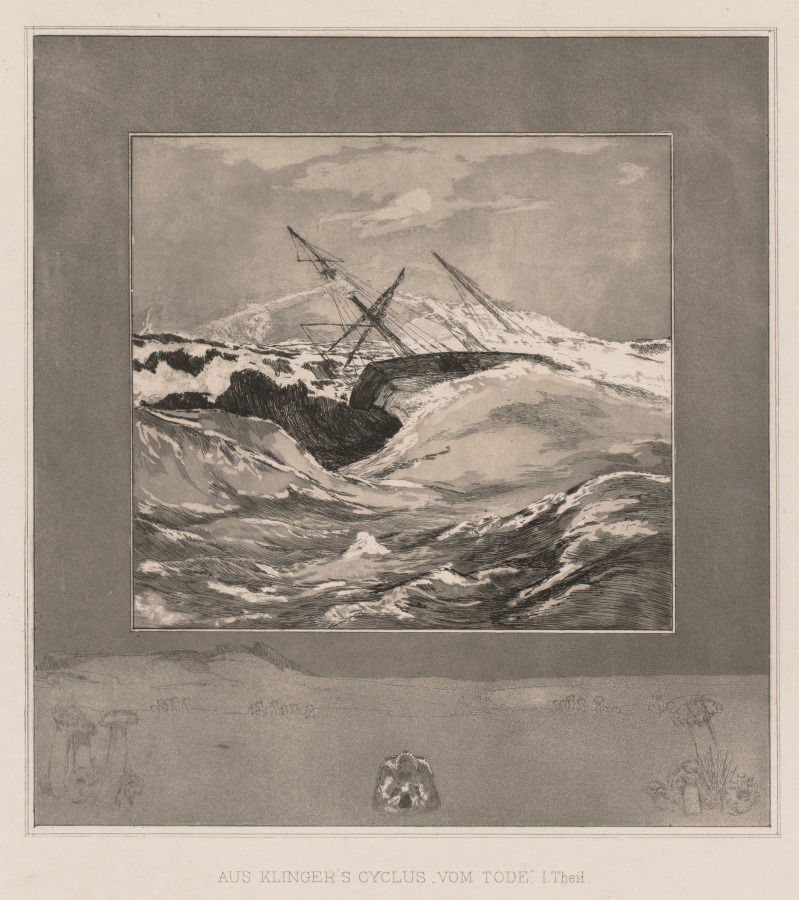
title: Sea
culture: Germany, 20th century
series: On Death, Part I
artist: Max Klinger (German, 1857–1920)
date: 1889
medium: etching and aquatint on chine collé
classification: Print